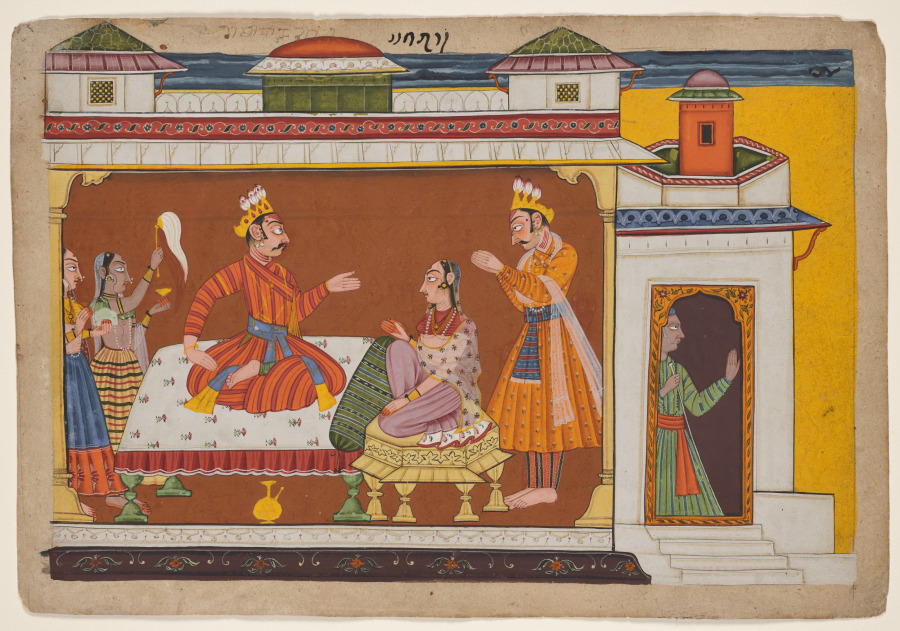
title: King Dasharatha confers with Kaikeyi, from the “Shangri” Ramayana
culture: Northern India, Pahari kingdoms, Himachal Pradesh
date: c. 1700–1725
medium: Gum tempera and ink on paper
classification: Painting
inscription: [[recto]] 16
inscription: [[recto]] (indistinct Takri note unrelated to the picture)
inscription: [[verso, in Sanskrit with Devanagari numerals]] 16 ayodhyā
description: Two years after the weddings of his four sons, King Dasharatha is ready to retire and name Rama as his successor. To simplify matters in the palace, he feels that he should send two of Rama’s brothers on a trip to visit their maternal grandfather, so that they will be away when he makes the announcement. In the top margin is the number 18 in the Takri script of the northwest Himalayas. It was not intended to remain visible because the opaque mercury-red or arsenic-yellow paint would have covered it. These toxic pigments, used to prevent insects or animals from eating the paper, were never applied to the border, indicating its unfinished state.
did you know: Dasharatha’s chief wife Kaushalya, mother of Rama, kneels on the golden stool.